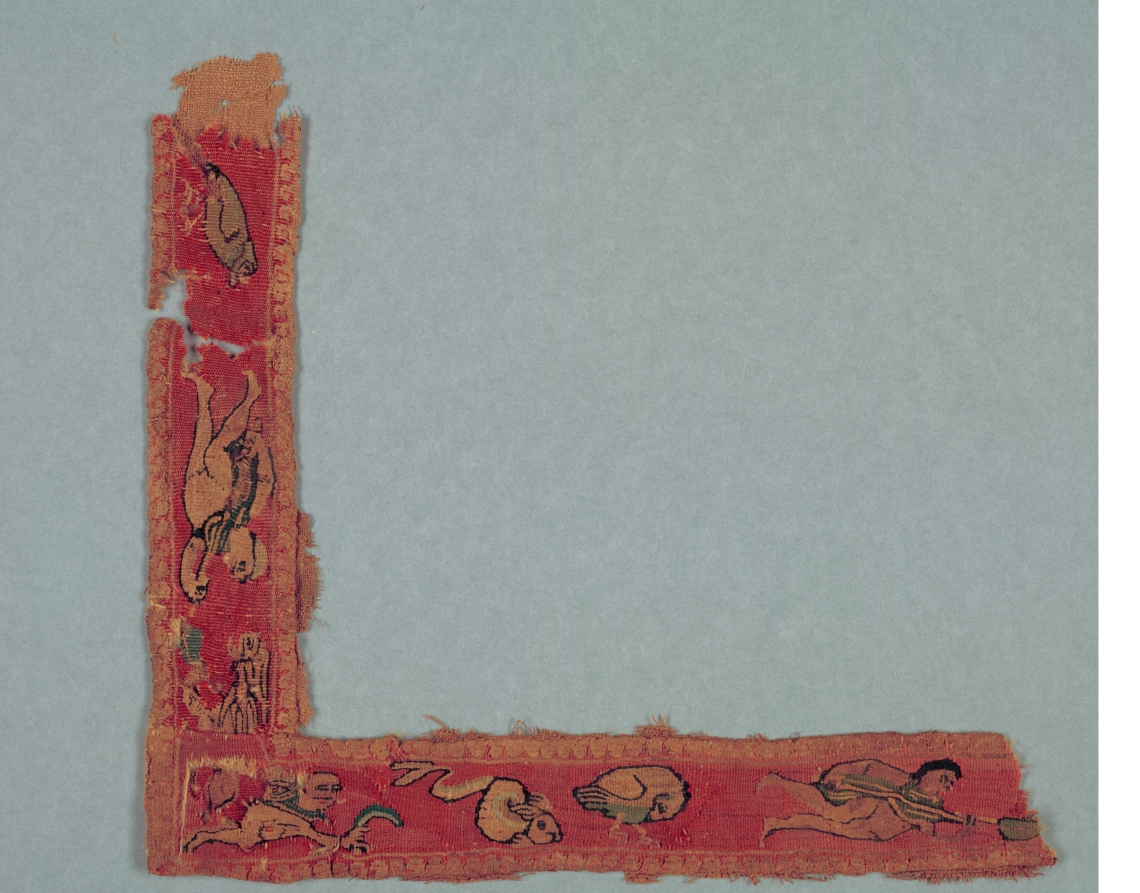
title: Fragment from a Child's Tunic: Right Corner Band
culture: Egypt, Umayyad period (661–750)?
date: 600s–700s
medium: Wool and linen: tabby weave, inwoven tapestry ornament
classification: Textile